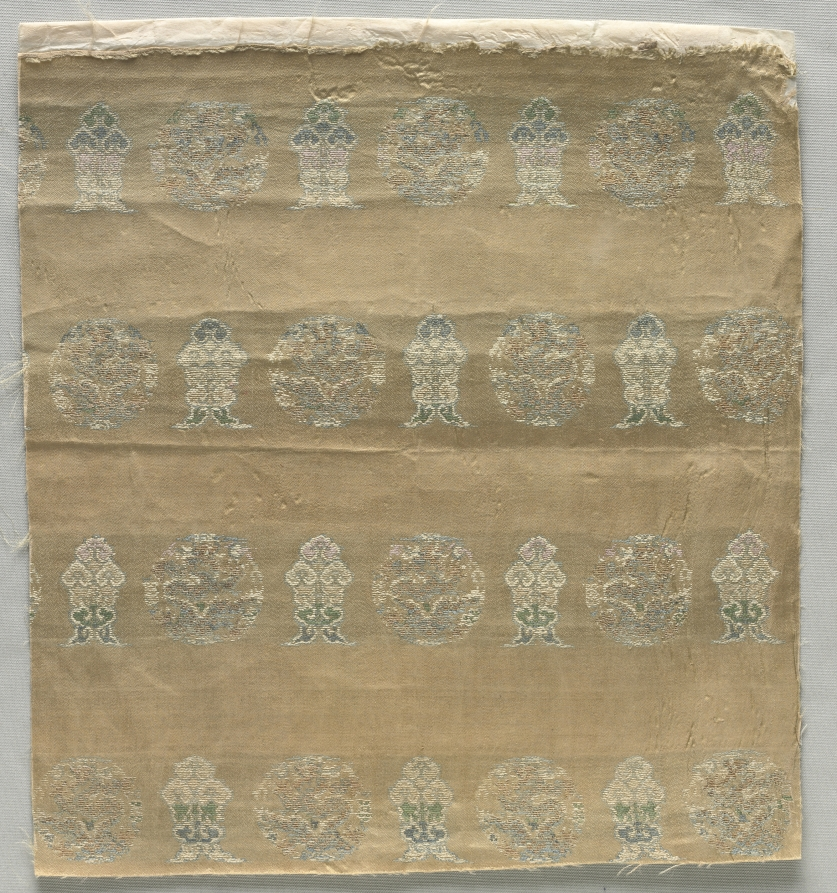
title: Fragment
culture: China, 18th century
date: 1700s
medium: brocaded satin, silk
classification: Textile